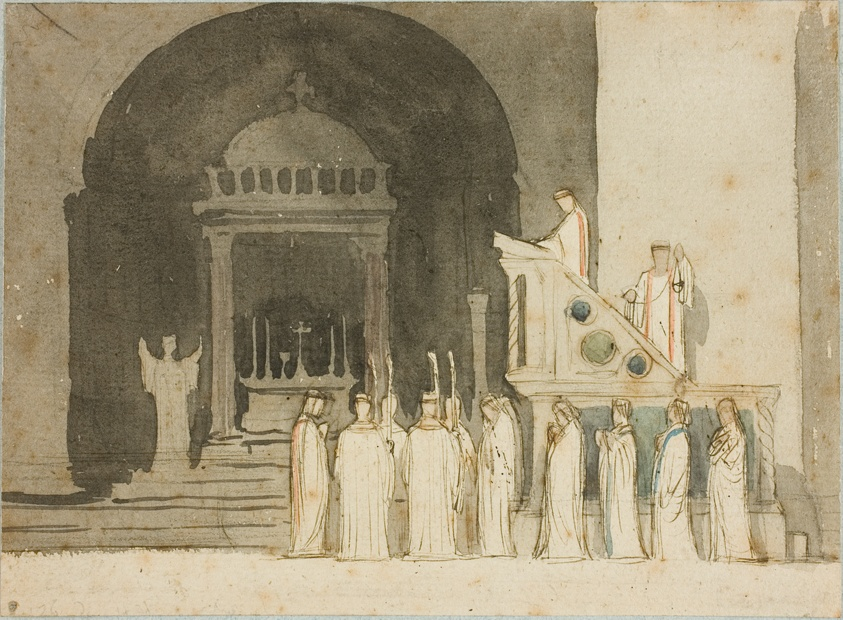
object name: Drawing and Watercolor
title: Altar of the Heavens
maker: Dominique Papety (French, 1815-1849)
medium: Brush and brown ink and wash, heightened with watercolor, on ivory laid paper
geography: France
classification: ink or chalk wash; drawings (visual works); prints and drawing